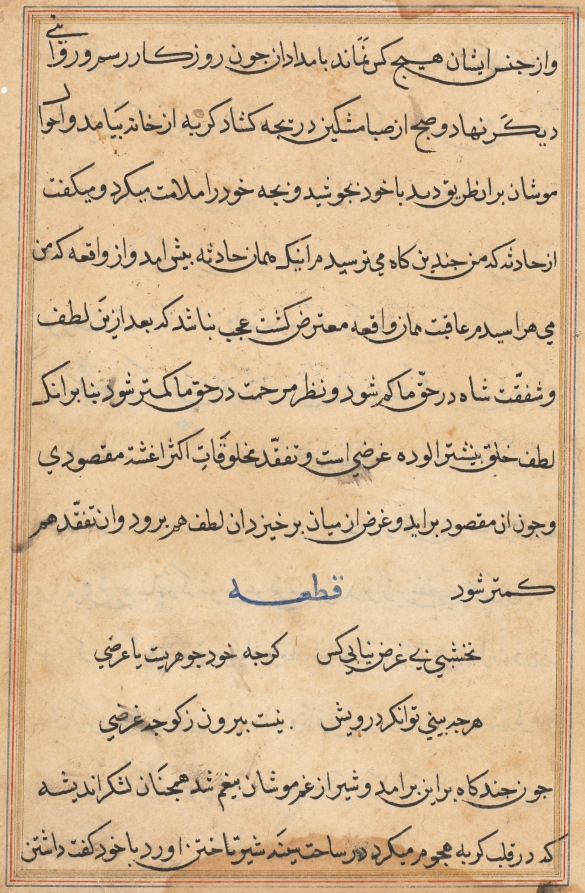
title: Page from Tales of a Parrot (Tuti-nama): text page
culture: Mughal India, court of Akbar (reigned 1556–1605)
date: c. 1560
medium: gum tempera, ink, and gold on paper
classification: Painting